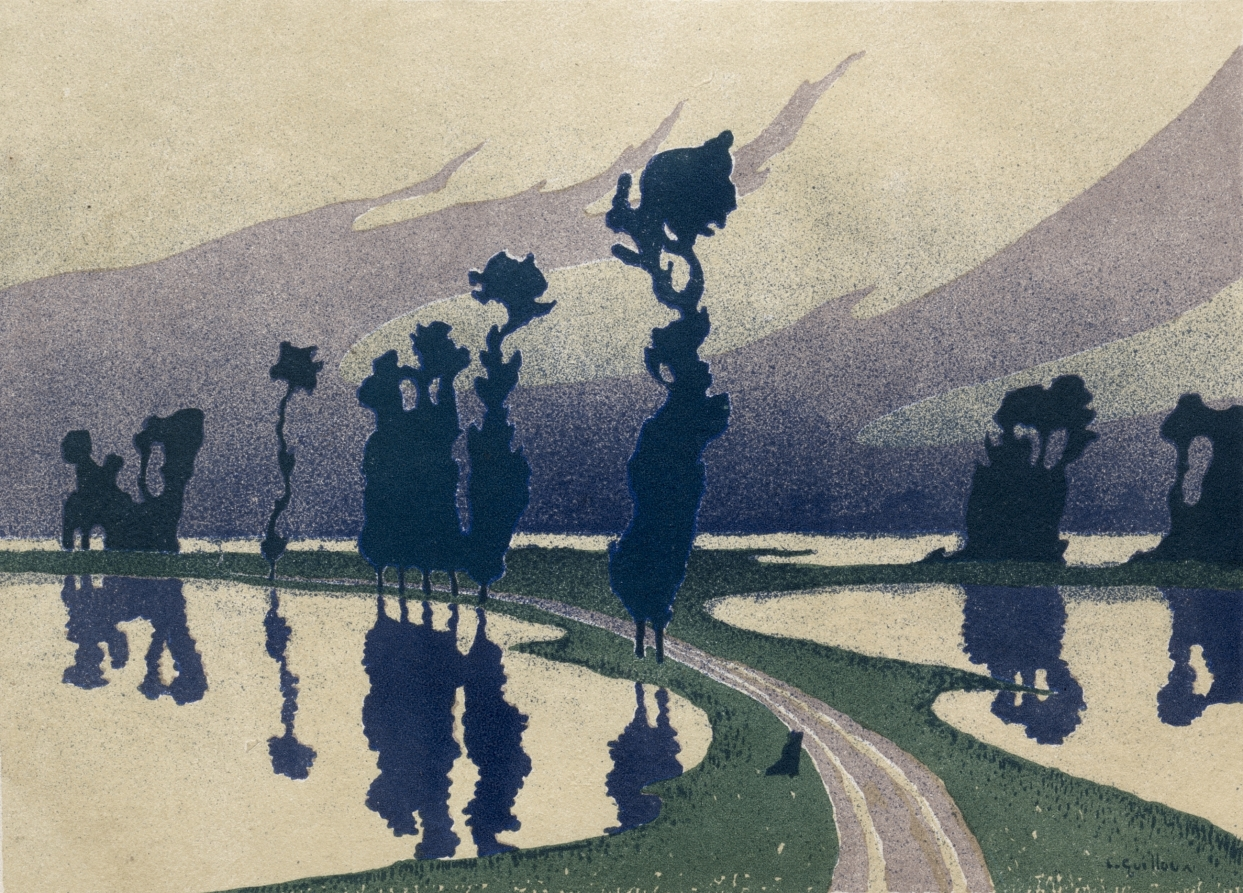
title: The Deluge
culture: France, 19th century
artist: Charles Guilloux (French, 1866–1946)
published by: L'Estampe Originale (blindstamp lower right)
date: 1893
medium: color lithograph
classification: Print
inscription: lower left in graphite: Guilloux no 38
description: Guilloux’s The Deluge appeared in the famous L’Estampe Originale, a series of nine albums of original prints published in Paris between 1893 and 1895, representing the pinnacle of fin-de-siècle printmaking. The albums included numerous landscapes by masters of the genre, including Camille Pissarro, Charles Dulac, Henri Rivière, and Joseph Pennell (all in this exhibition). In The Deluge, drenched poplar trees are reflected in shimmering pools of water. Guilloux incorporated the aesthetic of Art Nouveau into his entirely original, stylized landscapes.